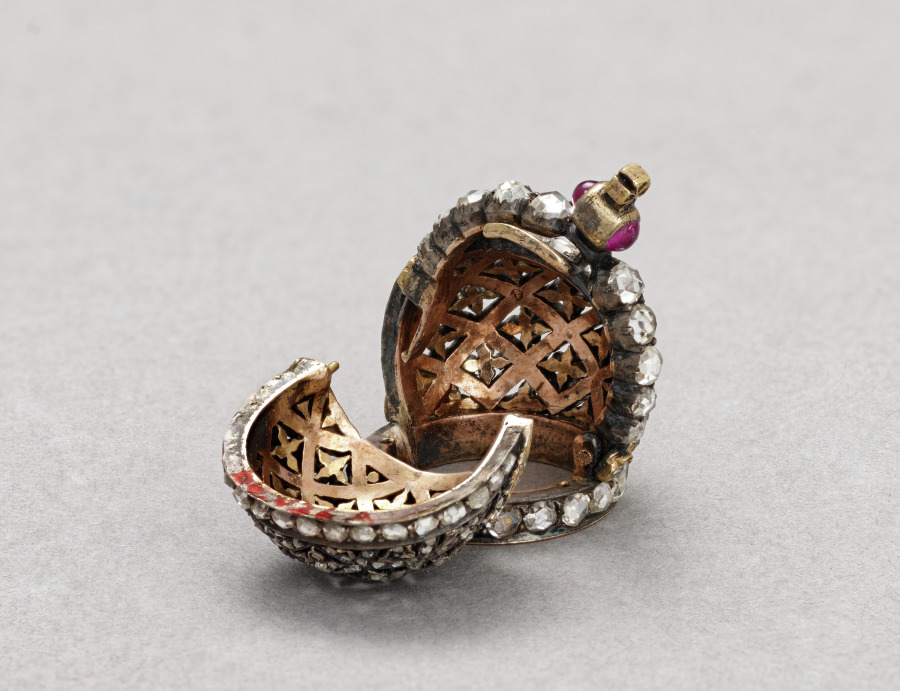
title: Miniature Crown Surprise from the Lapis Lazuli Easter Egg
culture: Russia, St. Petersburg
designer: attributed to Peter Carl Fabergé (Russian, 1846–1920)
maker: attributed to House of Fabergé (Russian, 1842–1918)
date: c. 1885–90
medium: gold, enamel, lapis lazuli, pearls, diamonds, rubies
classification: Miscellaneous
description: This Easter egg, like the subsequent ones produced by Fabergé for the imperial family, contains a surprise when opened. In this case, the egg opens to display a yellow enameled cover, resembling an egg yolk, which then opens to reveal a tiny replica of the Russian imperial crown, containing either a ruby or a pink sapphire suspended on a chain.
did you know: The tiny diamond encrusted crown surprise is a replica of the Russian imperial crown made for Empress Catherine the Great in the 1700s.